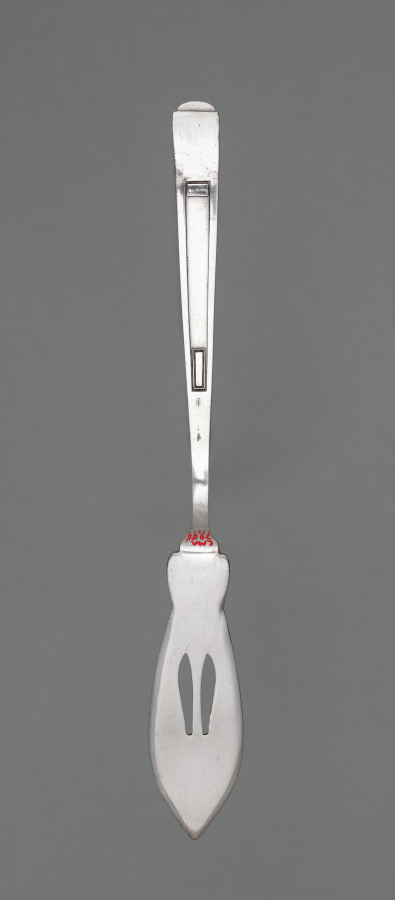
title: Fish Knife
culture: Germany, late 19th-early 20th Century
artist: Josef Maria Olbrich (German, 1867–1908)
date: c. 1900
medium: silver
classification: Silver